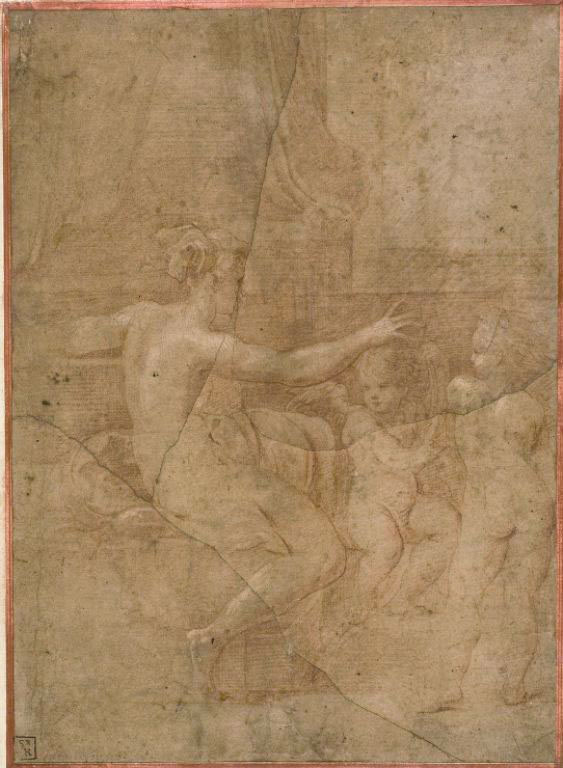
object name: Drawing and Watercolor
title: Venus with Cupid and Putto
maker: Attributed to Parmigianino; Italian, 1503-1540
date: 1527/30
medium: Red chalk, heightened with white, with traces of incising, on brown laid paper, laid down on cream card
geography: Italy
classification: chalk; drawings (visual works); prints and drawing